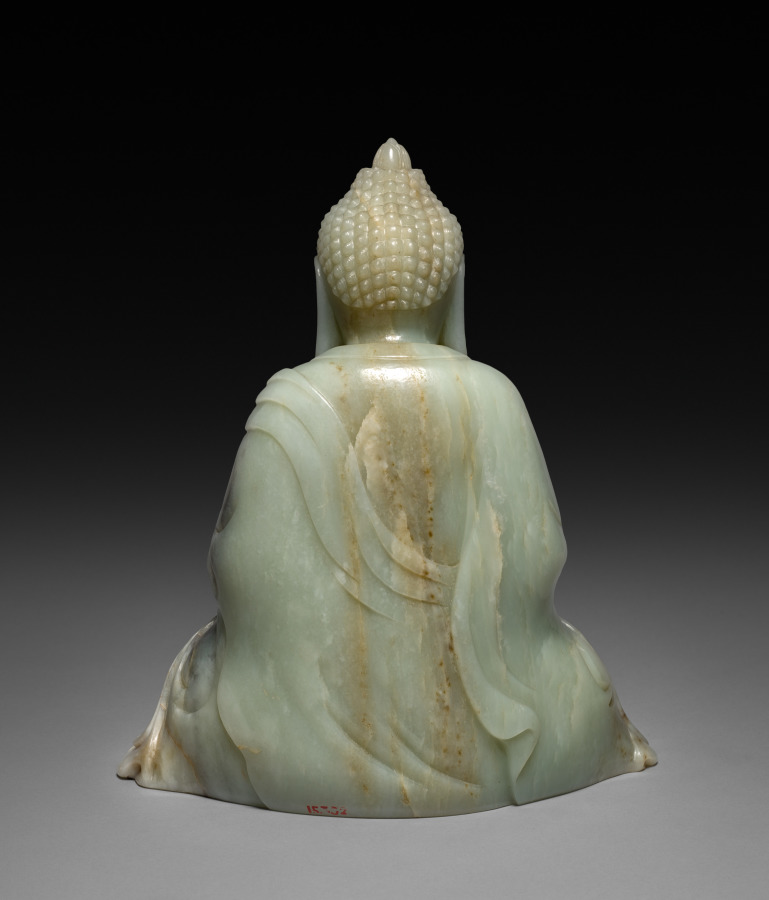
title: Seated Buddha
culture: China, Qing dynasty (1644-1911)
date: 1700s–1800s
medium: jade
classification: Jade